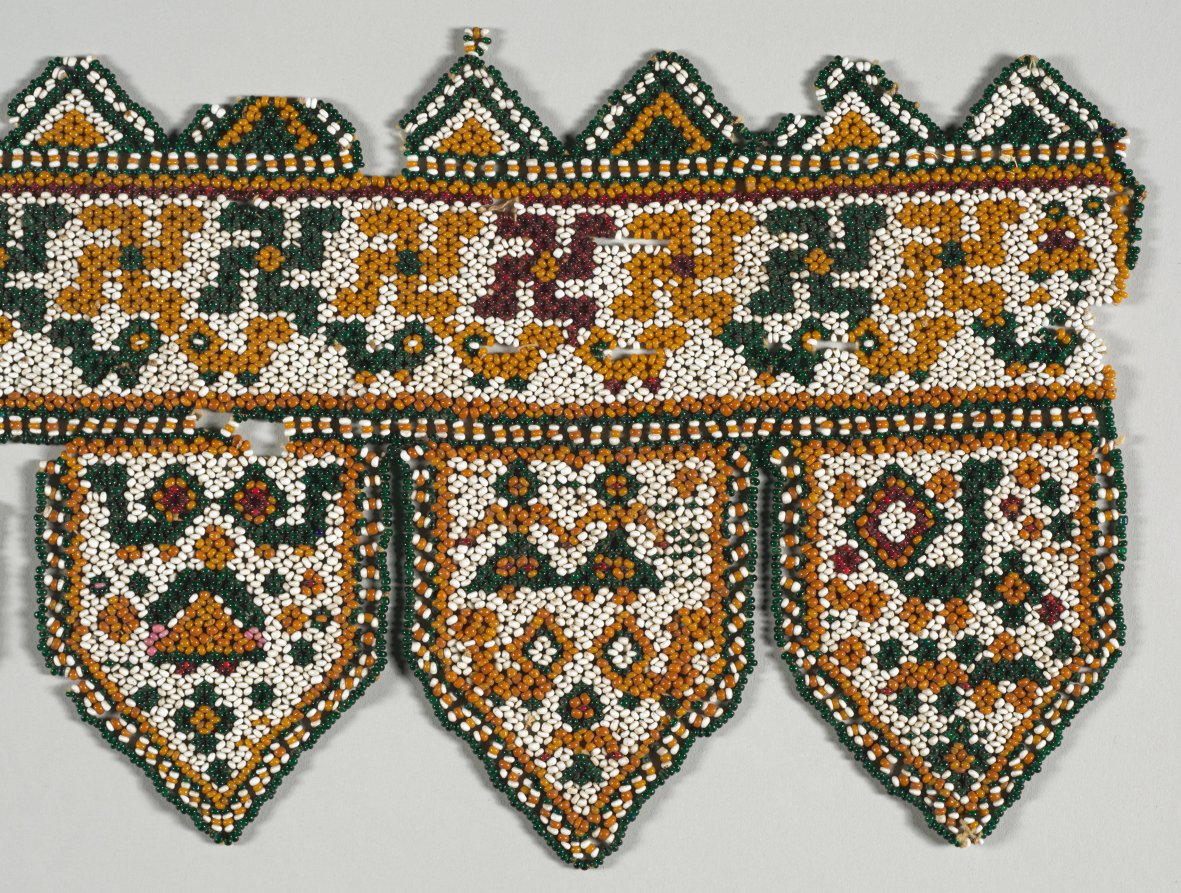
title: Beadwork (for Hanging over Doorways)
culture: India, 19th or early 20th century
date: 1800s or early 1900s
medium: beads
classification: Textile